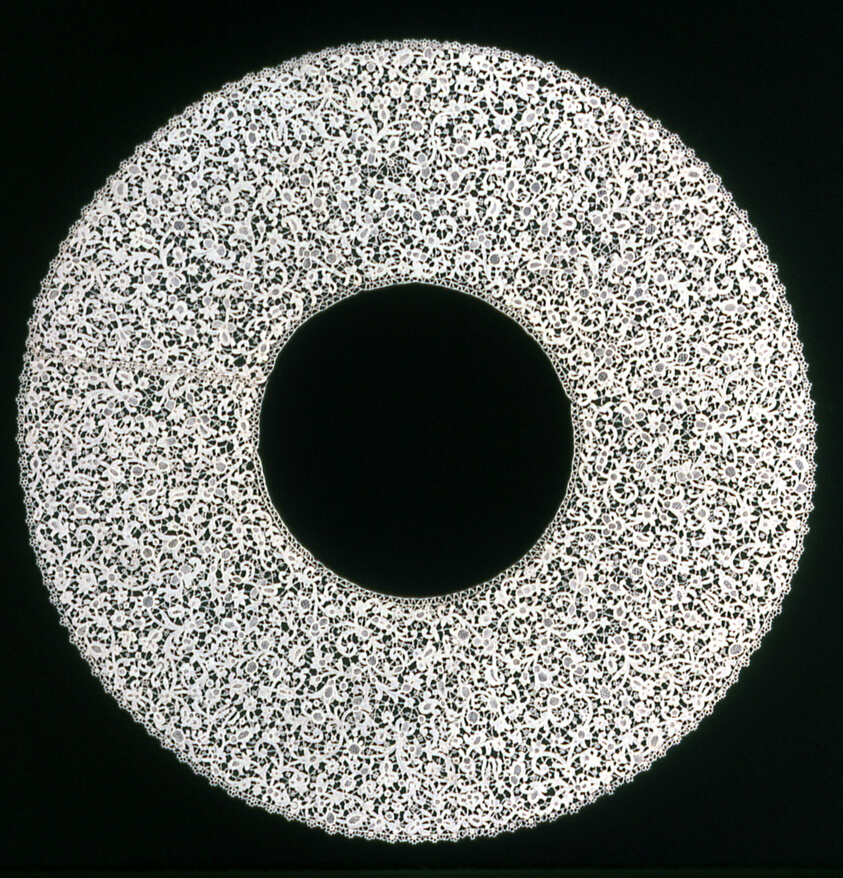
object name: Textile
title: Bertha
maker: Italy, Burano, possibly Burano School of Lace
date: Late 1890s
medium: Cotton, needle lace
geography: Burano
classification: textile; lace - needle